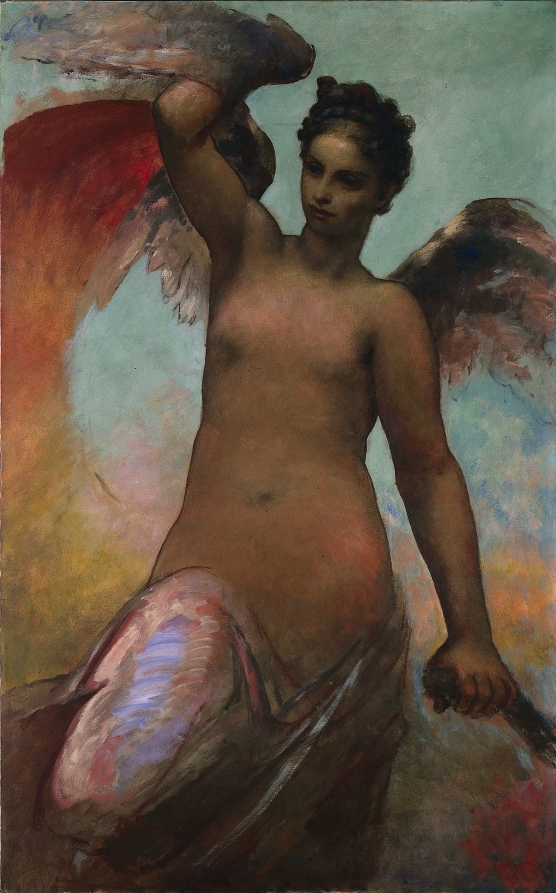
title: Winged Fortune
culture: America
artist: William Morris Hunt (American, 1824–1879)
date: 1878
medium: oil on canvas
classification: Painting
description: This painting is a full-size study for one of the figures in The Discoverer, a mural that William Morris Hunt painted on the vaulted roof of the Assembly Chamber at New York's state capitol in Albany. The mural showed Christopher Columbus standing boldly in a boat facing west. Winged Fortune stood behind him, her left hand holding the rudder as her right hand spread the sail. Hope sat in the bow, Science held a navigational chart, and Faith, covering her eyes, swam blindly ahead. Hunt only had two months to paint the murals, making many preparatory studies like this one. Not long after Hunt's death, massive leakage and cracking began to destroy the murals, which he had painted directly onto the wall. Eventually, a new ceiling was added to the chamber, concealing the murals completely.